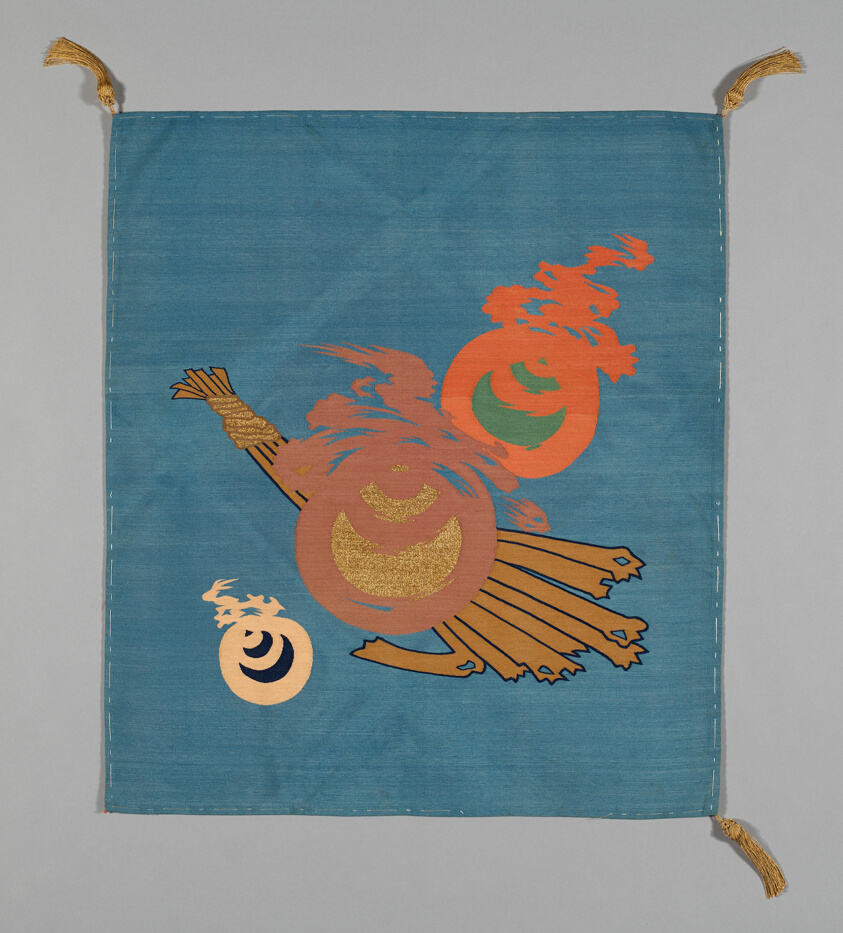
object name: Textile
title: Fukusa (Gift Cover)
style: late edo, meiji, edo (japanese period), Japanism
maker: Japan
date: late Edo period (1789–1868)/ Meiji period (1868–1912), 19th century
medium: Patterned side: silk and gold-leaf-over-lacquered-paper strip wrapped cotton, slit tapestry weave (tsuzure); Lining: silk, 7:1 satin damask weave (donsu); sewn with front and lining matched in size (Tachikiri awase); silk, running “controlling” stitches along all edges; corners: gold-leaf-over-lacquered-paper-strip wrapped silk, 1:1 tubular oblique interlacing over cotton core, knotted; gold-leaf-over-lacquered-paper-strip wrapped silk wrapped cotton ball, and re-plied fringe tassels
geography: Japan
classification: textile; weaving; printed